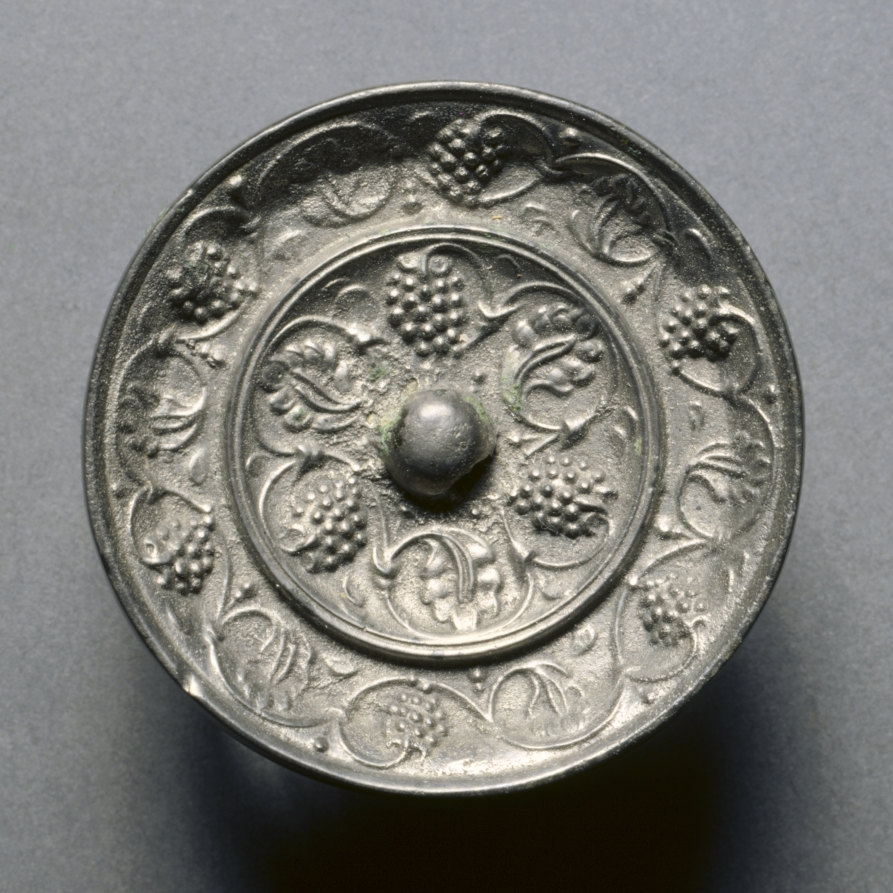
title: Miniature Mirror with Grape Decoration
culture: China, Tang dynasty (618-907)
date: 600s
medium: bronze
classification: Metalwork